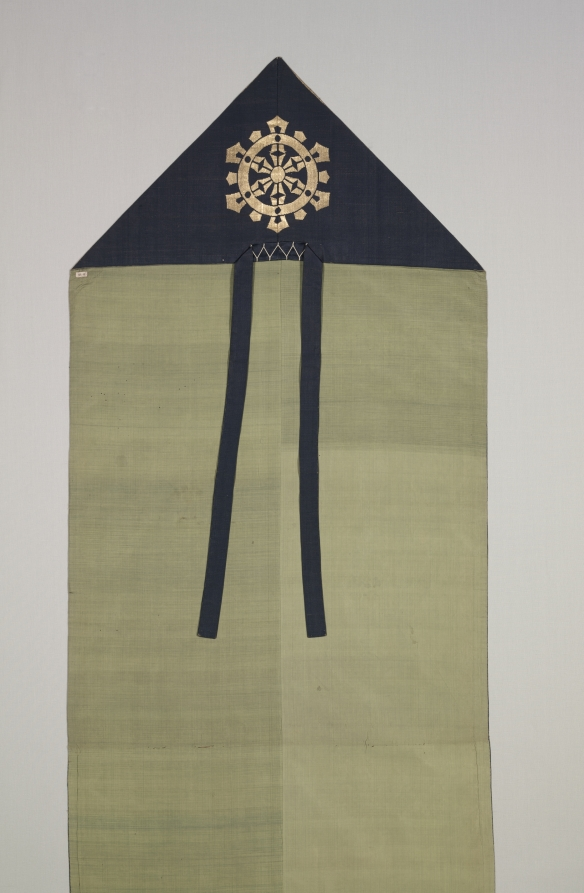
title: Sumibōshi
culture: Japan, Edo period (1615–1868)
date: 1800–1850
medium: silksatin weave; metal thread weft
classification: Garment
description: Sumibōshi literally means "hat with corners" in Japanese, and refers to the square shape made when this textile hat is tied on the head. Actors playing the roles of religious figures in Nō theater often wear this kind of cap. It derives from Buddhist vestments.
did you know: The design on this hat is meant to resemble metal hanging ornaments adorning the interiors of Japanese Buddhist temples.